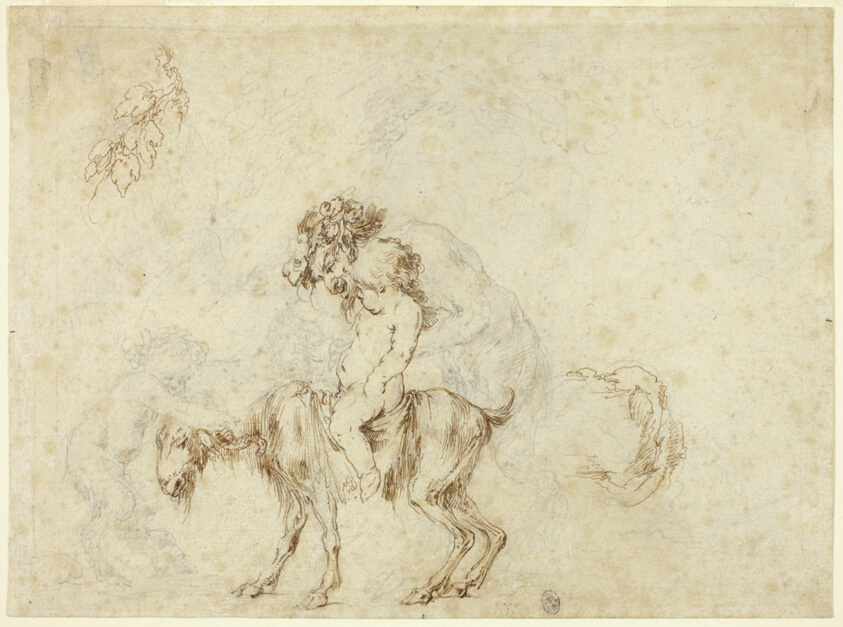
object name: Drawing and Watercolor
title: Study for Satyr Family Walking (recto); Sketches of Five Decorative Vessels (verso)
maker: Stefano della Bella (Italian, 1610-1664)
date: c. 1657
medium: Pen and brown ink and graphite (recto and verso) on ivory laid paper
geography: Italy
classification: pen and ink drawings; drawings (visual works); prints and drawing